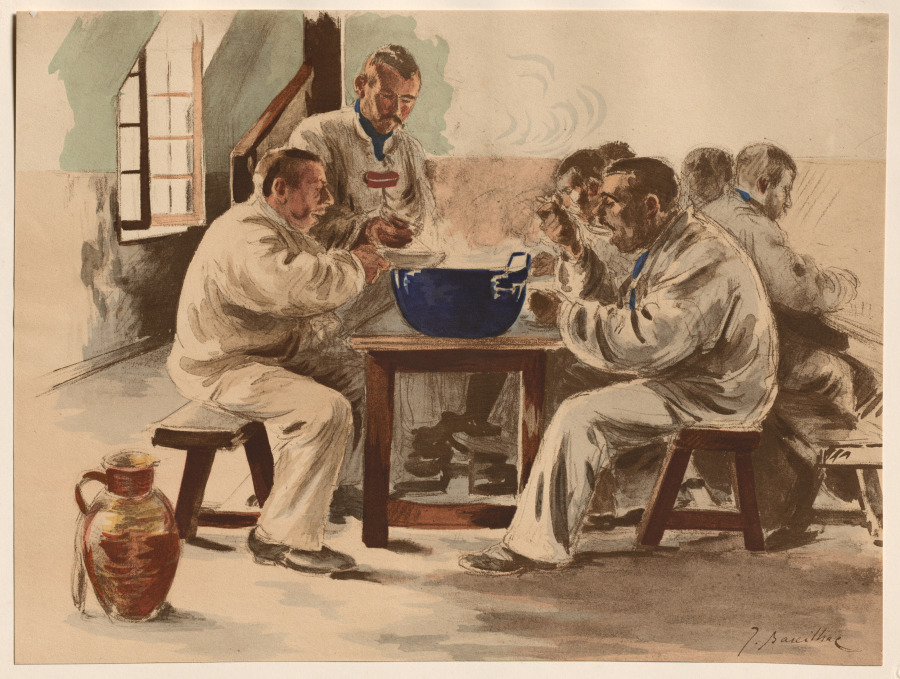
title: La Soupe à la Chambrée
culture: France, Paris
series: L'Estampe Moderne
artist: Jacques Baseilhac (French, 1874–1903)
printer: Imprimerie Champenois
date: 1899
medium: Color lithograph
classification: Bound Volume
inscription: In plate: lower right corner of image: J. Baseilhac; upper right corner of secondary support: blindstamp of l'Estampe Moderne (Lugt 2790)